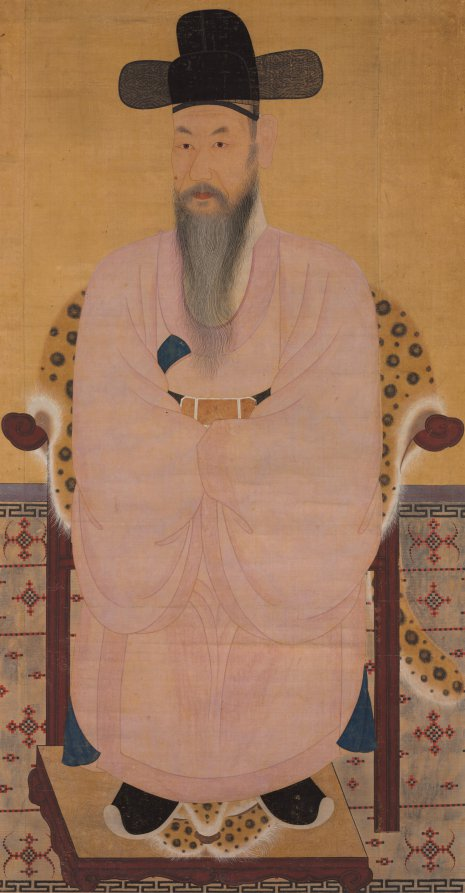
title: Portrait of an Official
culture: Korea, Joseon dynasty (1392–1910)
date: early 1800s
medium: Hanging scroll; ink and color on silk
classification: Painting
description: The quest of capturing one’s spirit through imagery held a special place in the tradition of portrait making in East Asia. A portrait’s resemblance to the subject was considered to be a way to transmit the sitter’s spirit to the viewer. A three-quarter view, much preferred in Joseon-period portraits like this one, allows the viewer to examine the sitter’s personality or spirit without an exchange of glances. Dressed in a pale pink court uniform, the gentleman sits on a chair draped with leopard skin, a symbol of royal favor. Due to the missing inscription, which was likely trimmed off, we cannot identify him. Yet, we know a few things: His uniform informs us that he worked in the royal court sometime during the 1700s or later because the color of office uniforms changed from dark green to pale pink in the early 1700s. Considered to be an important historical family relic, this type of full-length portrait was often placed above the spirit house and venerated during ancestral worship rituals.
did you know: A piece of leopard skin covering the chair is a typical gift from the royal court to court officials.